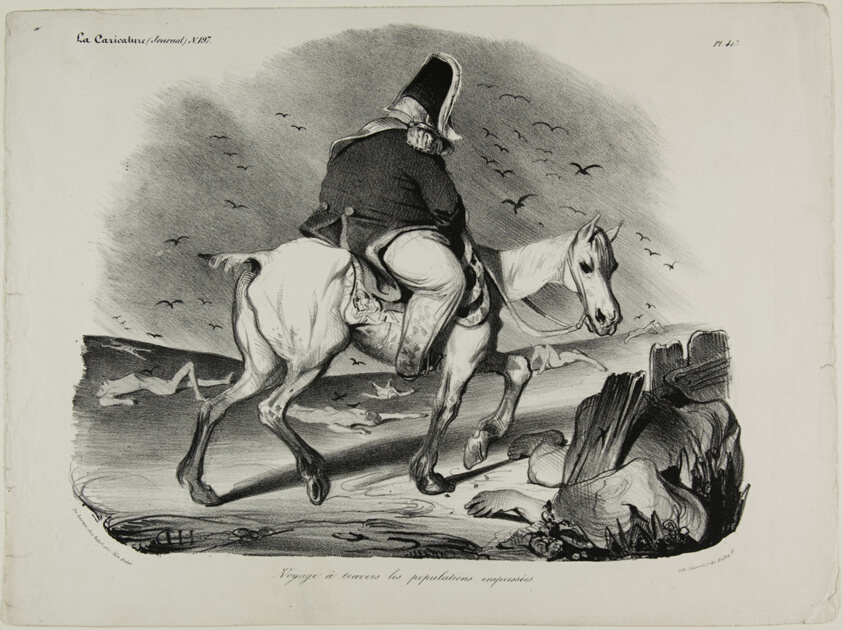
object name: Print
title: Travel across the attentive population, plate 413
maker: Honoré Victorin Daumier; French, 1808-1879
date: 1834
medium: Lithograph in black on white wove paper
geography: France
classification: lithograph; print; prints and drawing